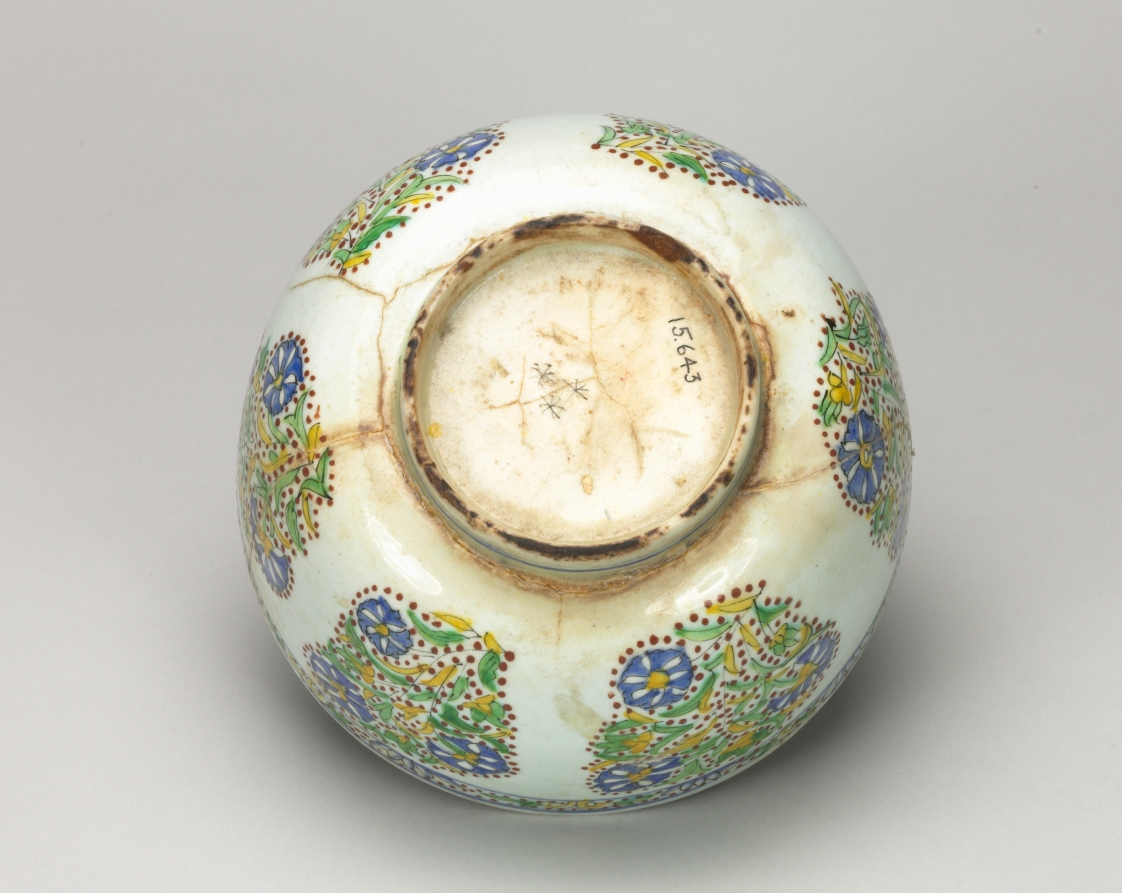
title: Deep Bowl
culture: Turkey (Kutahya), Ottoman Period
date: 1700s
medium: fritware with underglaze-painted design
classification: Ceramic